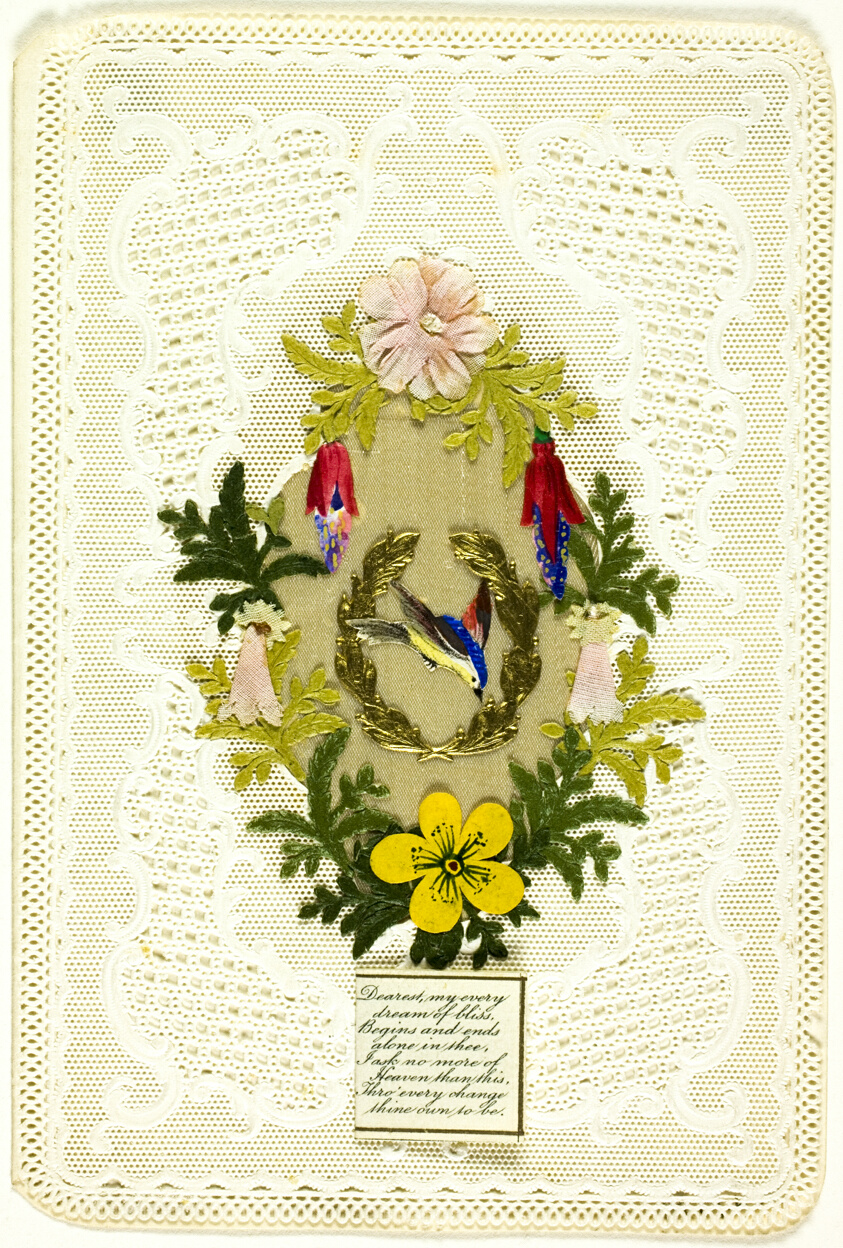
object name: Drawing and Watercolor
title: Dearest, My Every Dream of Bliss (valentine)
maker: Unknown Artist; English, 19th century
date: c. 1840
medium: Collaged elements on cut and embossed ivory wove paper (lace)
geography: England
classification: valentine; prints and drawing; paper